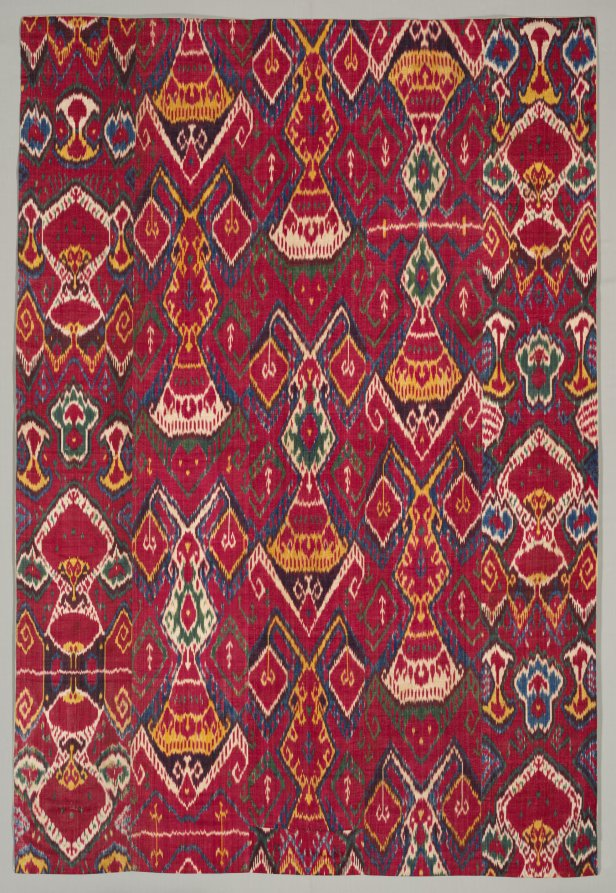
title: Wall Hanging (pardah)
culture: Uzbekistan, Bukhara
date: 1800–1850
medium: Silk: warp-faced plain weave, warp-ikat; cotton weft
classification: Textile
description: Dazzling patterns with saturated colors in the ikat technique provided vibrant wall hangings in reception rooms of the urban elite in Central Asia. In this splendid example composed of five loom widths, the three central lengths display a precise design of amulets complemented by palmettes in the two outer lengths. The irregular contours, telltale indicators of ikat, are masterfully controlled with five rich colors, illustrating the high quality of the earliest known examples in Central Asia from the first half of the 1800s. In the ikat technique, the design was dyed on the warp before it was woven in a resist-dye process. Thread was tightly wrapped around the warp to resist dye penetration for each area of color. This labor-intensive process created hangings and garments cherished for their vibrant colors with "fuzzy" contours.